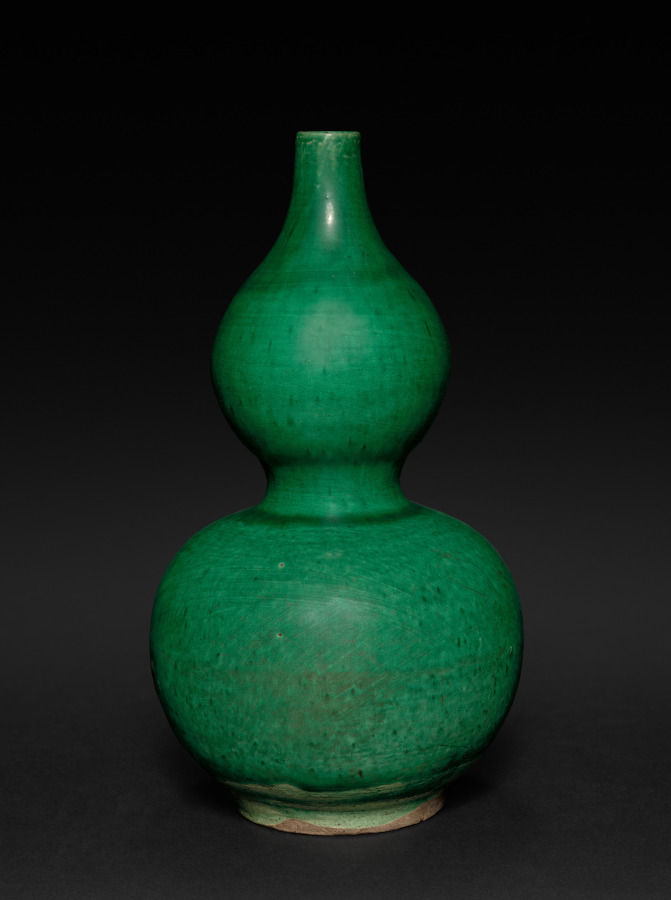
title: Double Gourd-shaped Green Vase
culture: China, Ming dynasty (1368–1644)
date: 1368–1644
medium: stoneware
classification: Ceramic